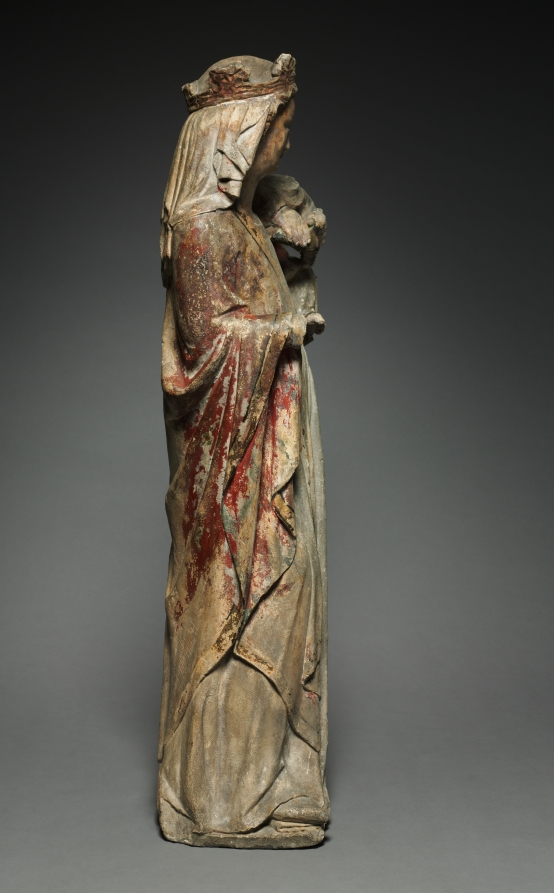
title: Virgin and Child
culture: France, Lorraine, 14th century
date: c. 1315–20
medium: limestone with traces of polychromy and gilding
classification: Sculpture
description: This graceful Virgin and child is a beautiful example from a large number of such figures produced in Lorraine, in eastern France, during the early 1300s. Lorraine at the time had a well-established artistic tradition and was under the rule of the Counts of Bar with established cultural links to both Flanders and England. Many of the surviving Lorraine Virgins share common characteristics consistent with this example--the swaying posture, with the weight of the Virgin placed on the left foot; and an open mantle with an exposed belted gown, the girdle itself trailing to the ground and ornamented with rosettes. Such standing figures were likely made for use in parish churches, cathedrals, aristocratic oratories, and monastic chapels, and attest to the intense veneration rendered to the Virgin during the period.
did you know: The CMA has a rare example of a similar woman’s belt (1930.742).